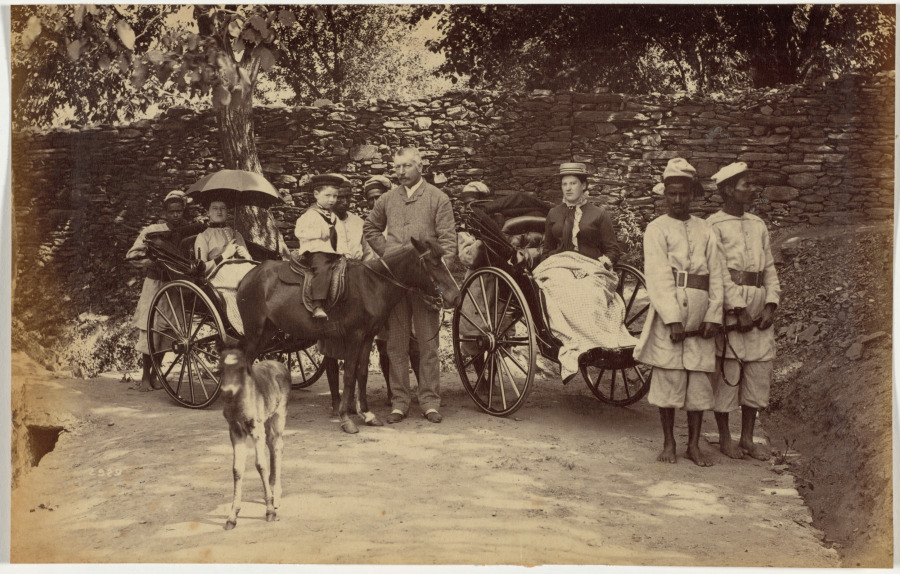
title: Colonel F. G. Oldham, Shimla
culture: India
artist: Raja Deen Dayal (Indian, 1844–1905)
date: 1887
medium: albumen print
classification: Photograph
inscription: Stamped in black ink on verso: “31.E.7” Written in pencil on verso: “Col J Goldham/3/Simla” Written in pencil on verso: “2929”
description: In Deen Dayal’s shots of large groups, the sitters are artfully arranged in close proximity, some even touching. But in his family portraits, at least in this album, the individuals are separated. The top image features Colonel H. R. Thuillier (1838–1922) holding his horse’s bridal, his wife Emmeline, their two terriers, and rickshaw drivers. Thuillier became the surveyor general of India the year this photograph was taken by Deen Dayal, who had just given up surveying for photography. Francis Oldham (1839–1923), an engineer at the India Public Works Department, poses with his wife Nora, their son Brian, an unidentified woman, and rickshaw drivers.